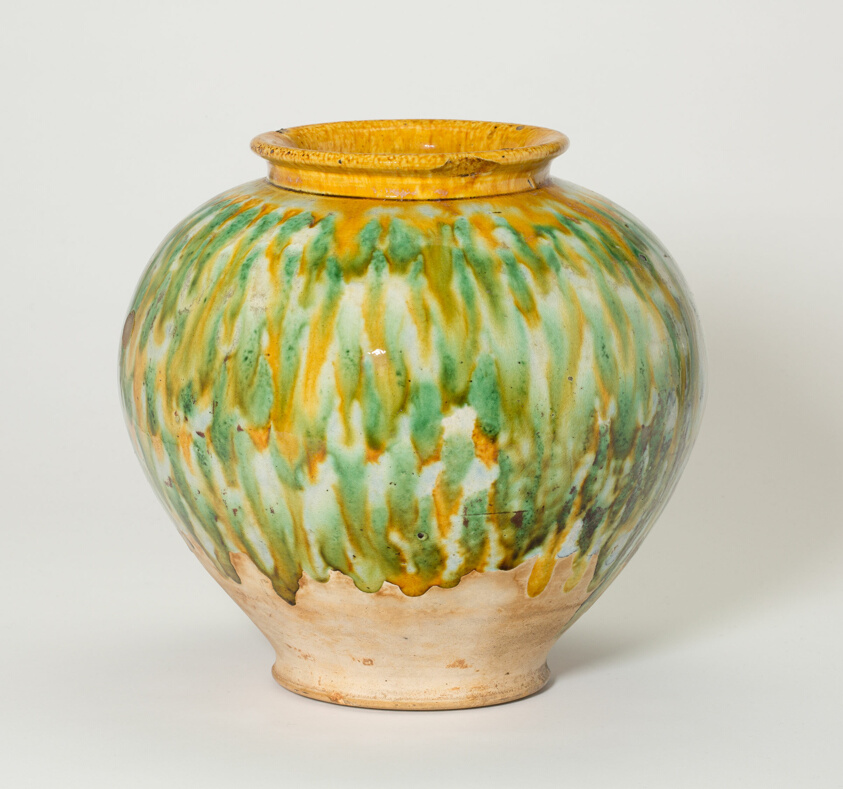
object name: Vessel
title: Jar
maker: China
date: Tang Dynasty (618–906)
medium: Earthenware with three-color (sancai) lead glazes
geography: China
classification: ceramics; asian art; vessel